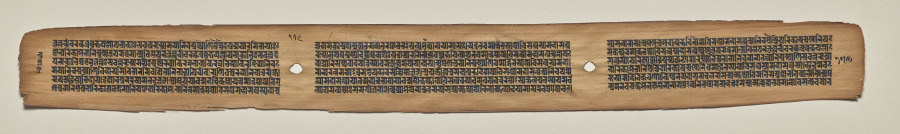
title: Text, folio 179 (verso), from a Manuscript of the Perfection of Wisdom in Eight Thousand Lines (Ashtasahasrika Prajnaparamita-sutra)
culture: Eastern India, Bihar, Vikramashila Monastery. Painting: Nepal, Kathmandu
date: Sunday, September 14, 1119 (year 239 of the Newar Samvat in the month of Ashvina)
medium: gum tempera and ink on palm leaves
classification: Painting